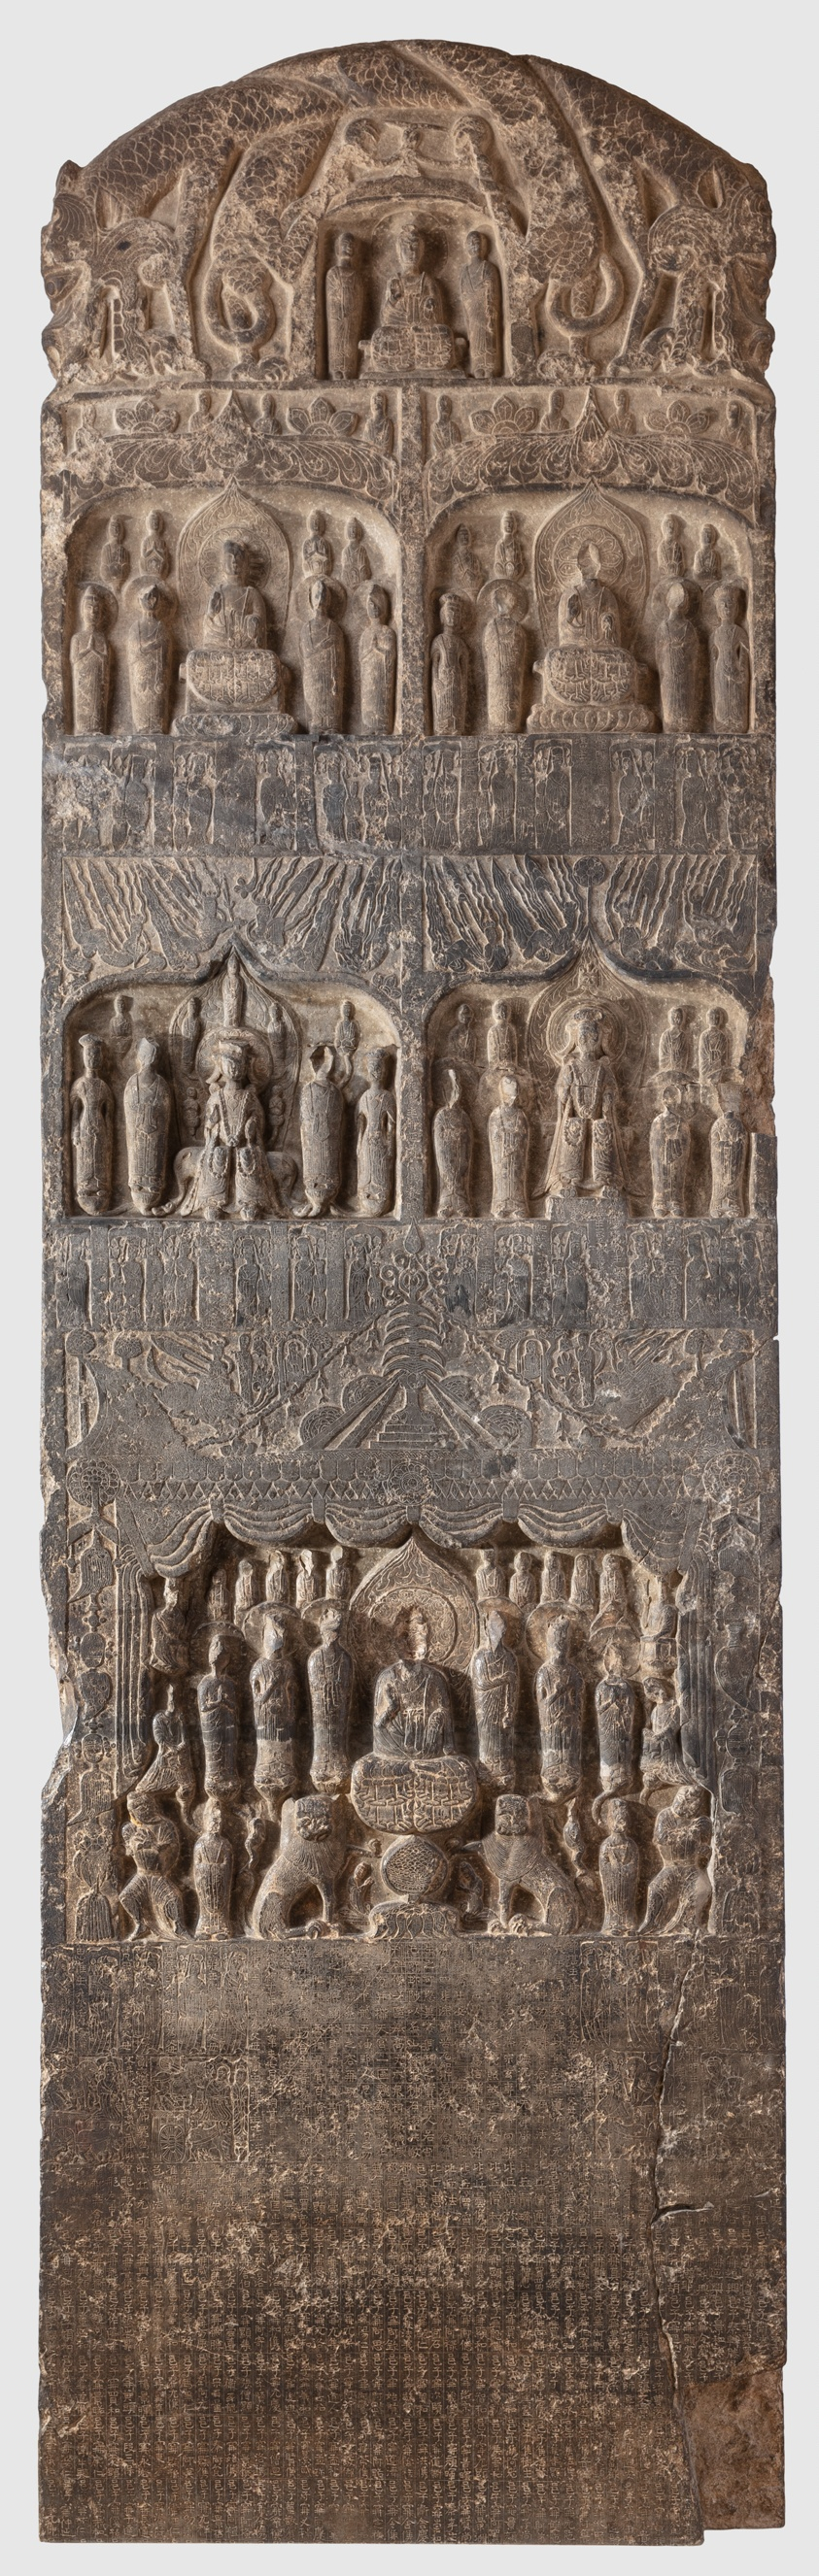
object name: Religious/Ritual Object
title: Buddhist Votive Stele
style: Chinese (culture or style)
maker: China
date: Western Wei dynasty (A.D. 535–557), dated A.D. 551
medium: Stone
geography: China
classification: stone (unidentified); stone; sculpture; asian art; ritual objects